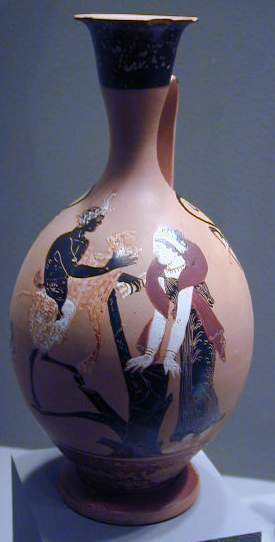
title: Black-Figure Lekythos (Oil Vessel): Pan Presenting Hare to Woman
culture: South Italian, Paestan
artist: attributed to Asteas/Python Workshop (South Italian, Paestan, active c. 360–320 BCE)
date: c. 330–320 BCE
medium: ceramic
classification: Ceramic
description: This round-bodied oil vessel, produced in Paestum, belongs to a small group of vessels decorated with black figure in the second half of the fourth century BC, long after the technique had previously fallen out of fashion. Unlike most such vessels, which are smaller and feature just a single figure (often a woman or bird), this one shows a more complex and colorful scene. The goat-legged god Pan perches on a branched tree trunk, holding his syrinx (panpipe) and a hare. Facing him, her hands on the trunk, is a draped woman, perhaps a nymph or the moon goddess Selene.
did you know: Although his name means “all” in Greek, Pan is primarily a god of shepherds.